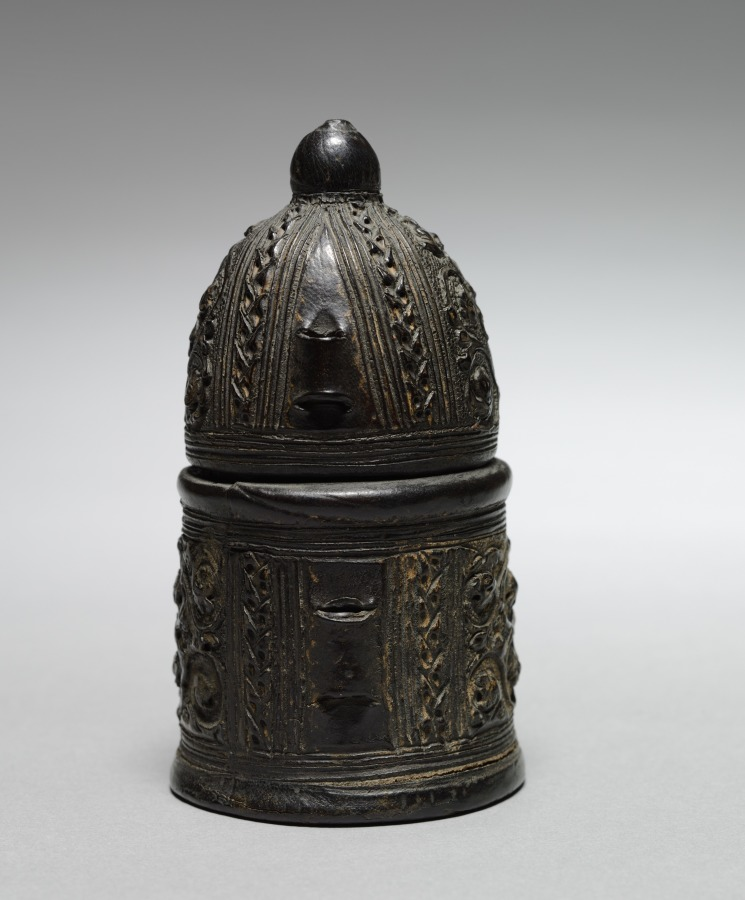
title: Ink Pot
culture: Northern Italy, 15th century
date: c. 1425–1450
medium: leather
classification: Leather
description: Intended for use on the writing table, this ink pot was used with a dip pen or quill. It may have belonged to a professional scribe or scholar, or perhaps to a wealthy layperson. The leather is embellished by tooling, embossing (pressing), and punching.